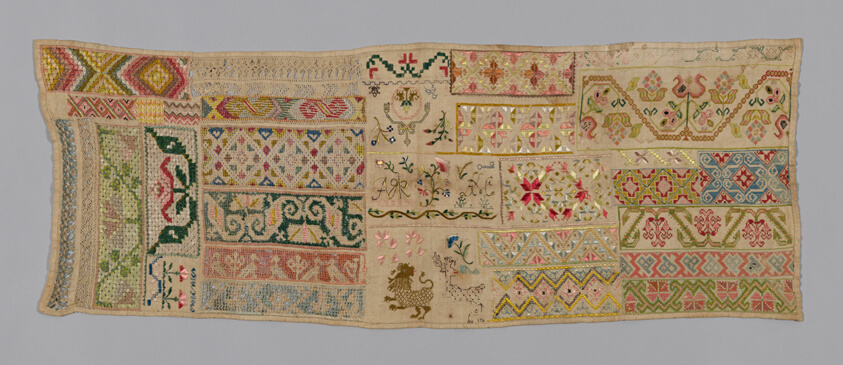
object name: Textile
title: Sampler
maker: Mexico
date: 1825/75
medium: Linen, plain weave; embroidered with silk floss in cross, long-armed cross, flame, running, double running, square open-work, and satin stitches; drawnwork embroidered with linen and silk floss in Aztec, buttonhole, chain, coral, darning, hem and interlocking stitches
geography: Mexico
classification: textile; weaving; needlework (visual works); sampler